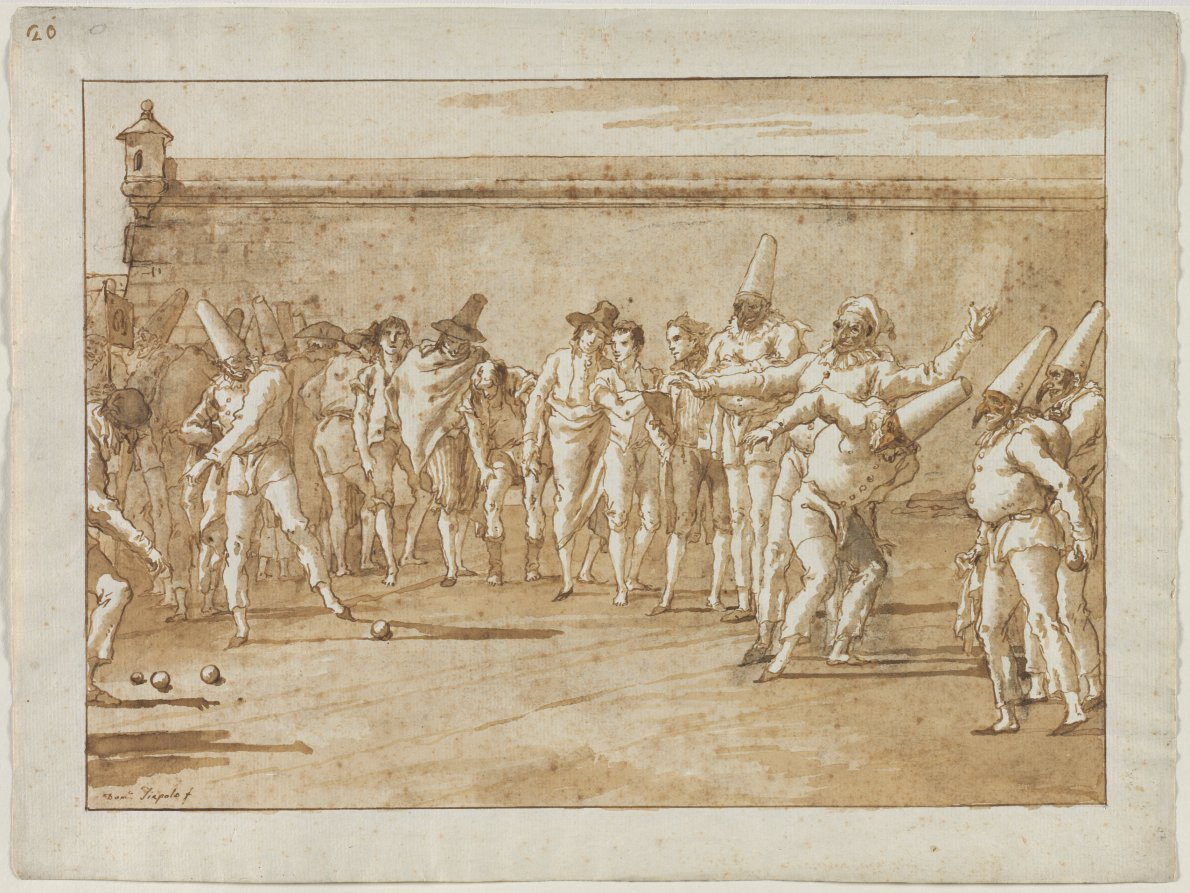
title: The Game of Bowls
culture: Italy, 18th century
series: Divertimento per li Regazzi (Entertainment for Children)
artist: Giovanni Domenico Tiepolo (Italian, 1727–1804)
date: 1797–1804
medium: pen and brown ink and brush and brown wash, over traces of black chalk; framing lines in brown ink over graphite on antique laid paper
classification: Drawing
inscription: signed, lower left, in brown ink: Dom°. Tiepolo f ; upper left, in brown ink: 20 ; upper left, in graphite: o ; lower right, in graphite: 20 [sideways] ; VERSO, upper right, in blue crayon: 3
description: Here, Punchinello characters sporting their signature conical hats and hooked-nosed masks compete against a group of men in a lively game of bocce,an Italian bowling game. While their exaggerated movements infuse the drawing with a sense of whimsy, the massive prison fortress behind them suggests surveillance and control. Although not overtly political, this detail may allude to Venice’s fall to the French in 1797, which led to a ban on the commedia dell’arte, Italy’s popular theater tradition with its mocking Punchinellos.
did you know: This drawing is part of a larger series that depicts the life of Punchinello, a clown-like character derived from Italian popular theater.